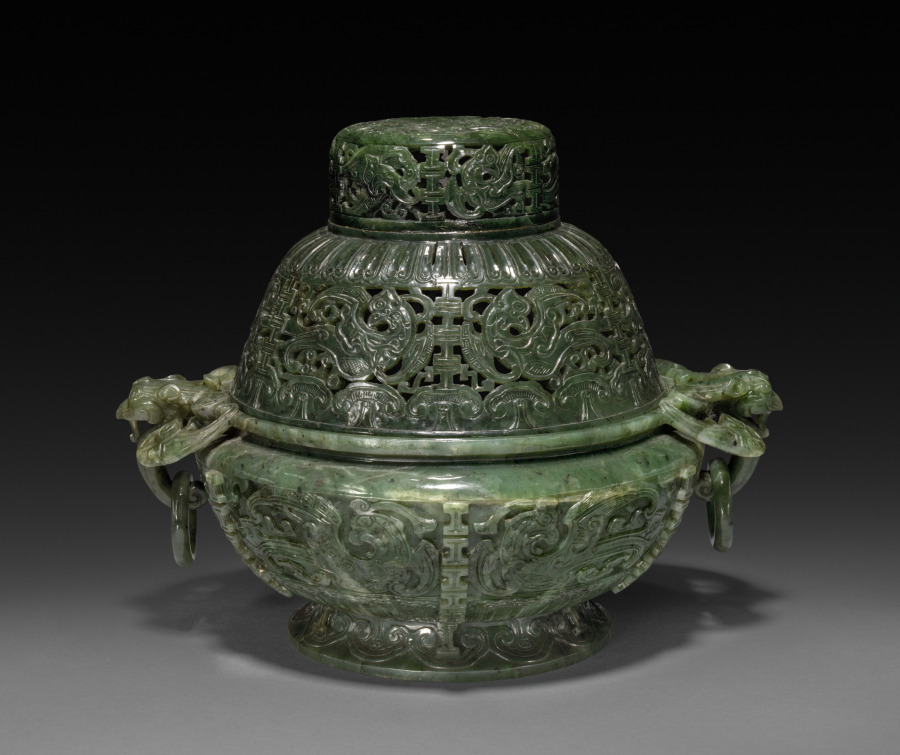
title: Koro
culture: China, Qing dynasty (1644–1911), Qianlong reign (1736–95)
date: 1736–95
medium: jade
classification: Jade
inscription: Qianglong mark on base